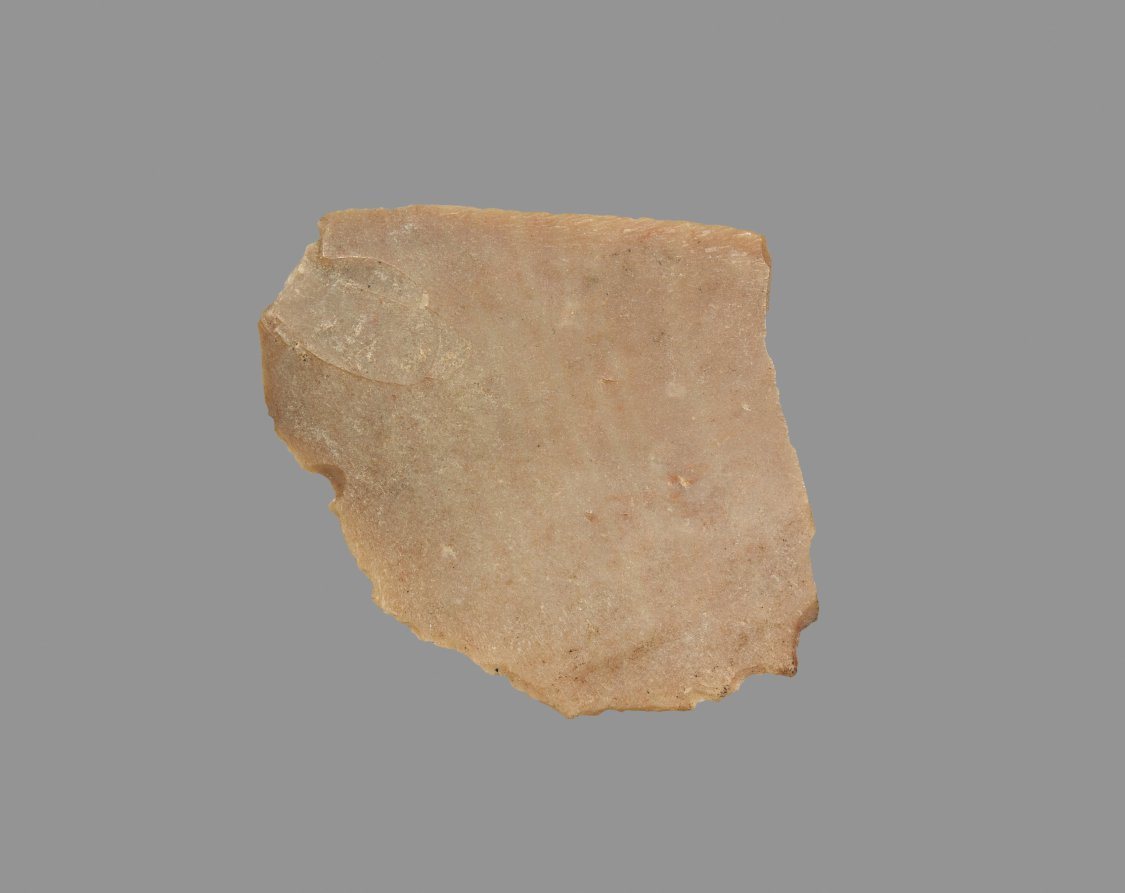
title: Sickle Blade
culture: Egypt, Middle Kingdom (2040–1648 BCE), Dynasty 12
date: 1980–1801 BCE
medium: flint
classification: Implements